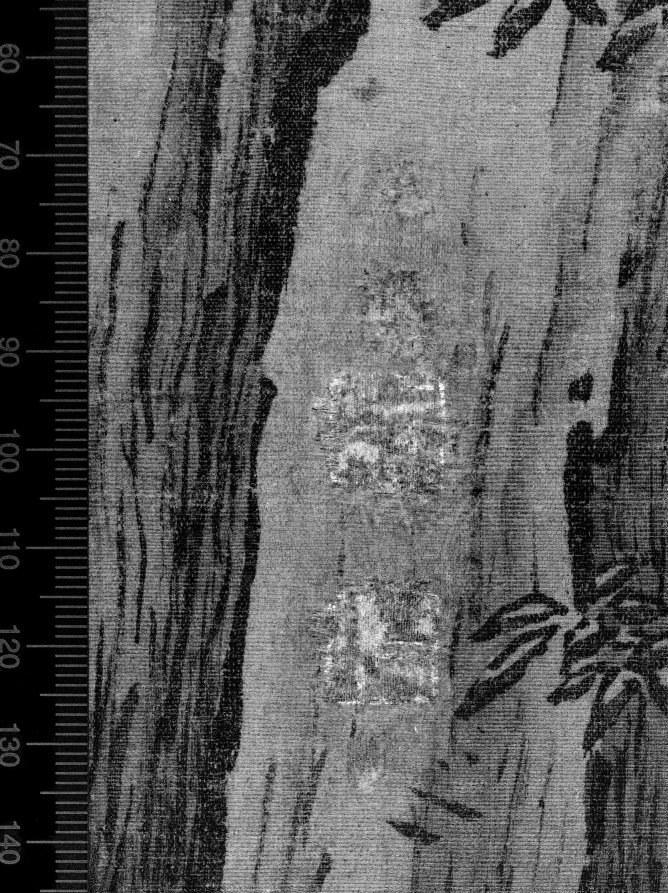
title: Birds in a Grove in a Mountainous Winter Landscape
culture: China, Jin dynasty (1115-1234)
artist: possibly by Gao Tao (Chinese, 1100s)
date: 1100s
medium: hanging scroll; ink and slight color on silk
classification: Painting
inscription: A signature and a seal at lower left edge: Gao Tao 高燾; seal undecipherable. 10 additional seals: 1 of Zhu Gang 朱棡 [1358–1398]; 3 of Suo’etu 索額圖 [1636–1703]; 2 of A’erxipu 阿爾喜普 [1700s]; 1 of Weng Fanggang 翁方綱 [1733–1818]; 3 unidentified.